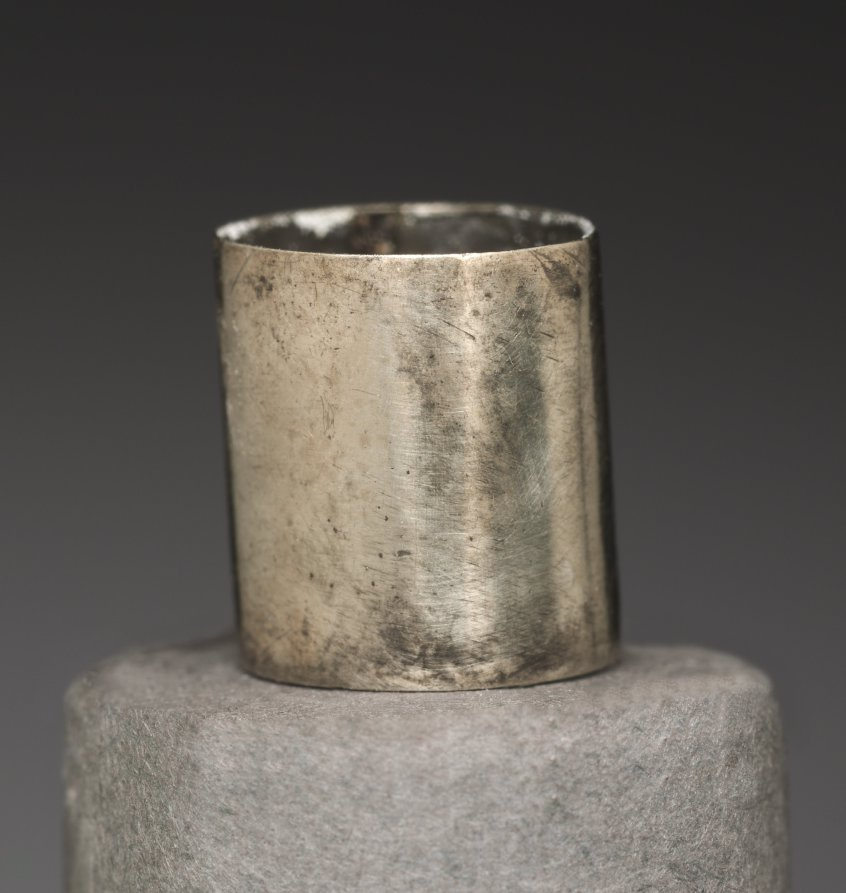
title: Element of Wig Decoration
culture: Egypt, Middle Kingdom (2040–1648 BCE), Dynasty 12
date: 1980–1801 BCE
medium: silver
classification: Jewelry